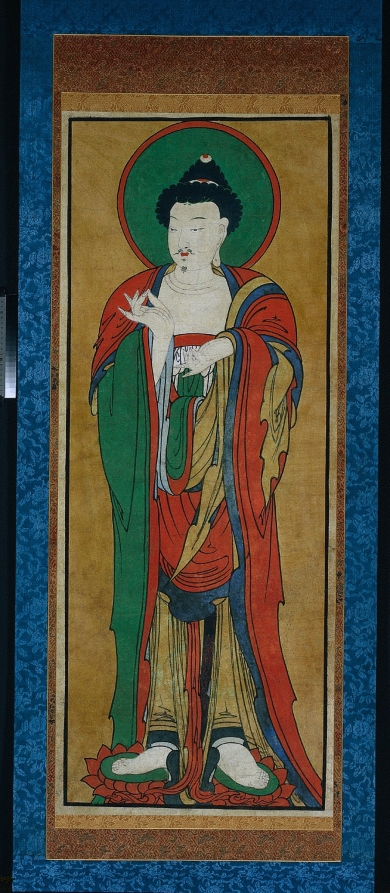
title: Tathagata Buddha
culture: Korea, Joseon dynasty (1392–1910)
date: late 1800s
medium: hanging scroll; ink and color on paper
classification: Painting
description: Buddhist paintings of the late Joseon period (from the 17th to the 19th century) have several characteristics different from their precedents. Generally, they were painted in bright mineral pigments on either thick paper or hemp. This large painting, which measures more than 2 meters tall, used to serve as a banner for outdoor Buddhist ceremonies such as the water-and-land rite (水陸會).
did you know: The term Tathāgata can be understood as both "one who has thus gone" and "one who has thus come."